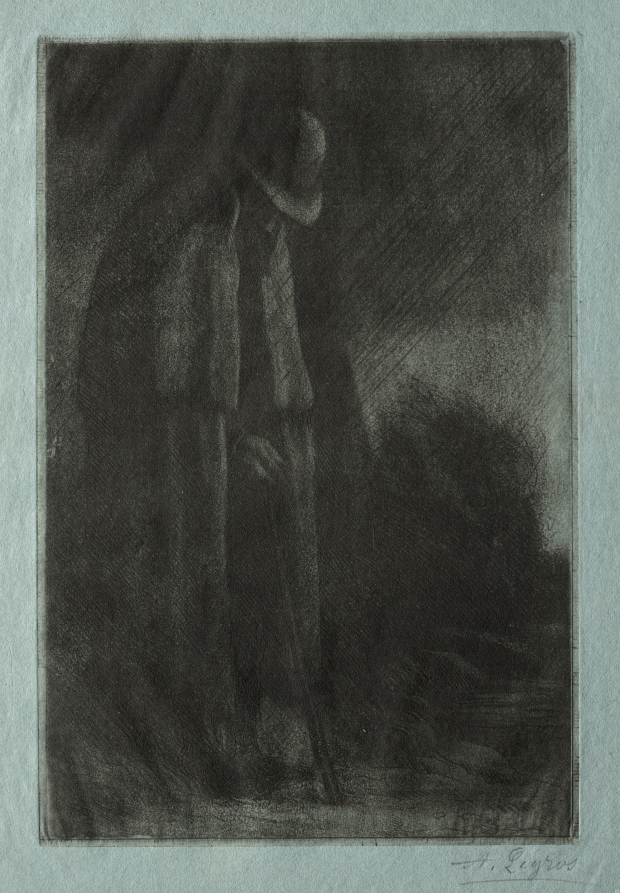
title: Le Voyageur à l'Abri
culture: France, 19th-20th century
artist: Alphonse Legros (French, 1837–1911)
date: c. 1857–1911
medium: etching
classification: Print